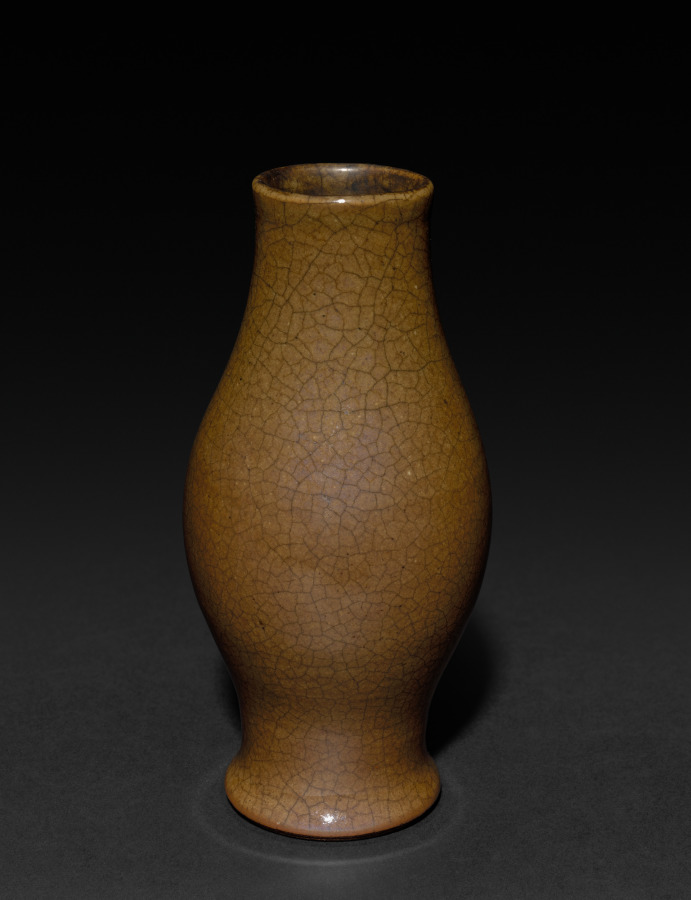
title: Vase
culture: China, Qing dynasty (1644-1911), Kangxi reign (1661-1722)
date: 1662–1722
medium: porcelain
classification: Ceramic